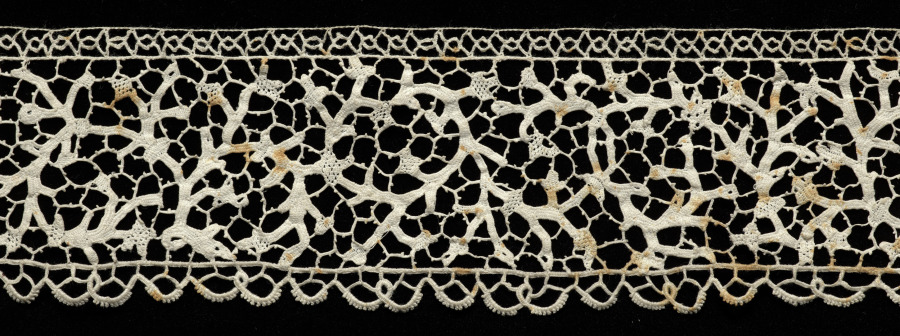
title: Fragment of Lace Edging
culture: Italy, Venice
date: 1660–99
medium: Needle lace (Punto Corallina)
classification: Lace